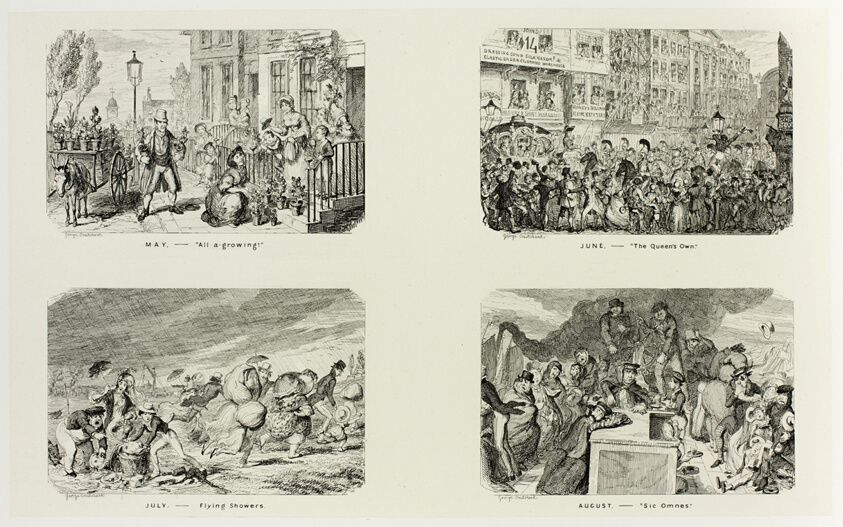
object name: Print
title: May – "All A Growing!" from George Cruikshank's Steel Etchings to The Comic Almanacks: 1835-1853 (top left)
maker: George Cruikshank (English, 1792-1878); published by Pickering & Chatto (English, 19th century)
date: 1838, printed c. 1880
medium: Four steel etchings in black on cream India paper, laid down on off-white card (chine collé)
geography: England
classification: etching; paper; print; prints and drawing